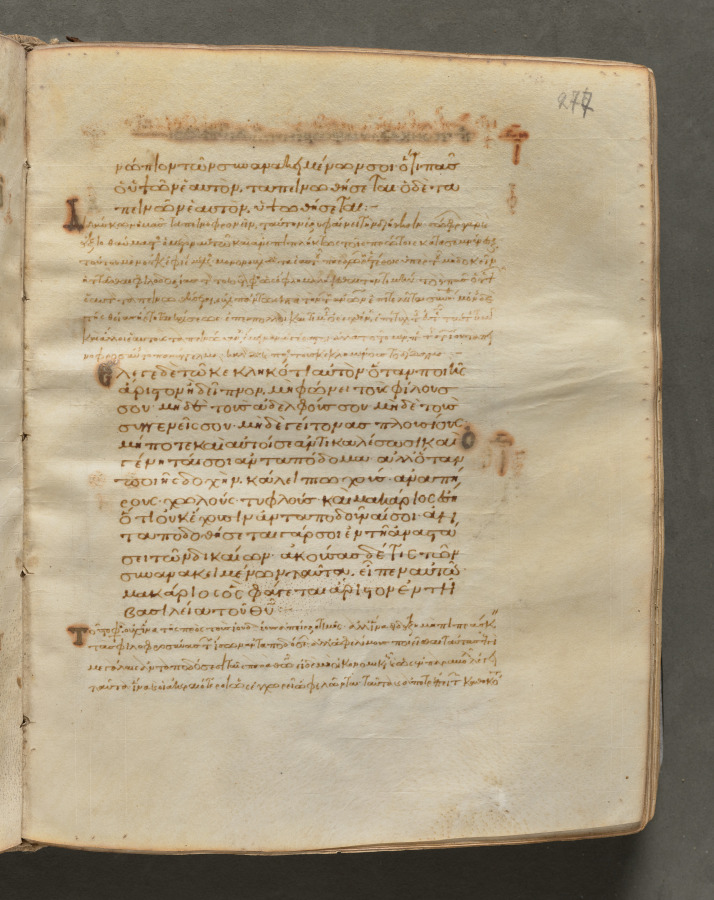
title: Text, folio 277 (recto), from a Gospel Book with Commentaries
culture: Byzantium, Constantinople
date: c. 1000–1100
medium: ink, tempera, and gold on vellum; leather binding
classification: Bound Volume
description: Each of the four gospels in this book opens on a page with brilliantly illuminated borders depicting the author of the text as well as birds—principally peacocks, symbols of the immortality of the soul—and fountains, representing the fountain of life and the salvation of the soul. This volume consists of 428 leaves with texts in Greek. Its level of sophistication suggests that it was probably written and decorated in a monastery in Constantinople.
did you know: Gospel books were carried in procession through Byzantine churches.